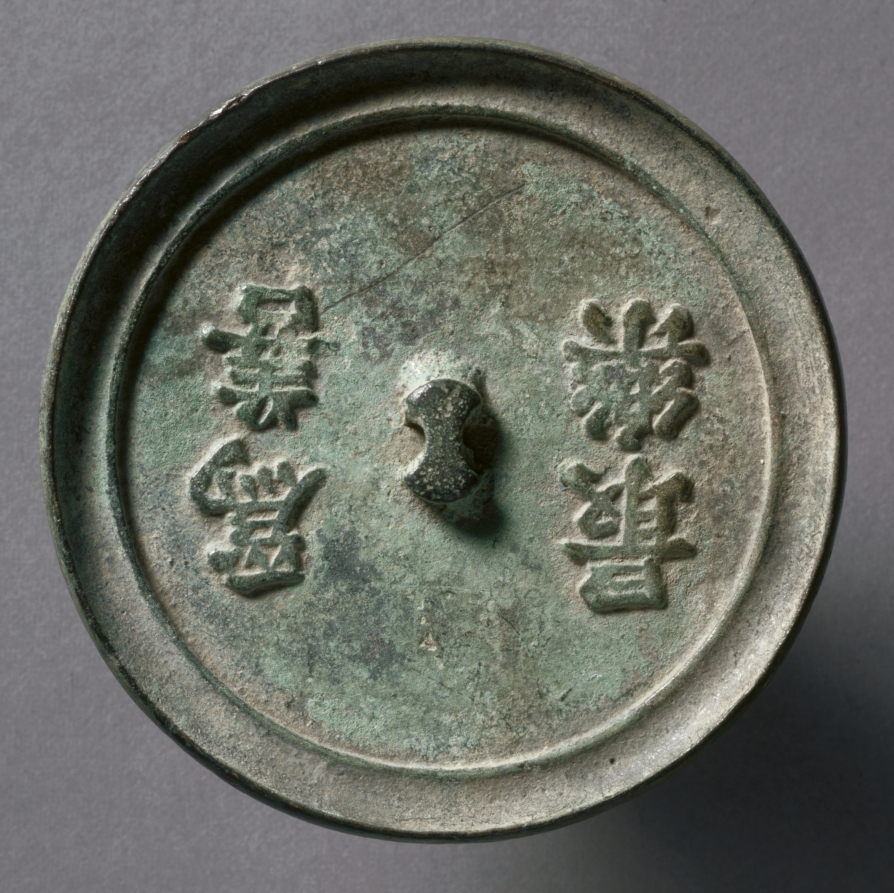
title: Mirror with Confucian Maxim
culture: China, Ming dynasty (1368–1644)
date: 1400s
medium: bronze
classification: Metalwork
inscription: 為善最樂